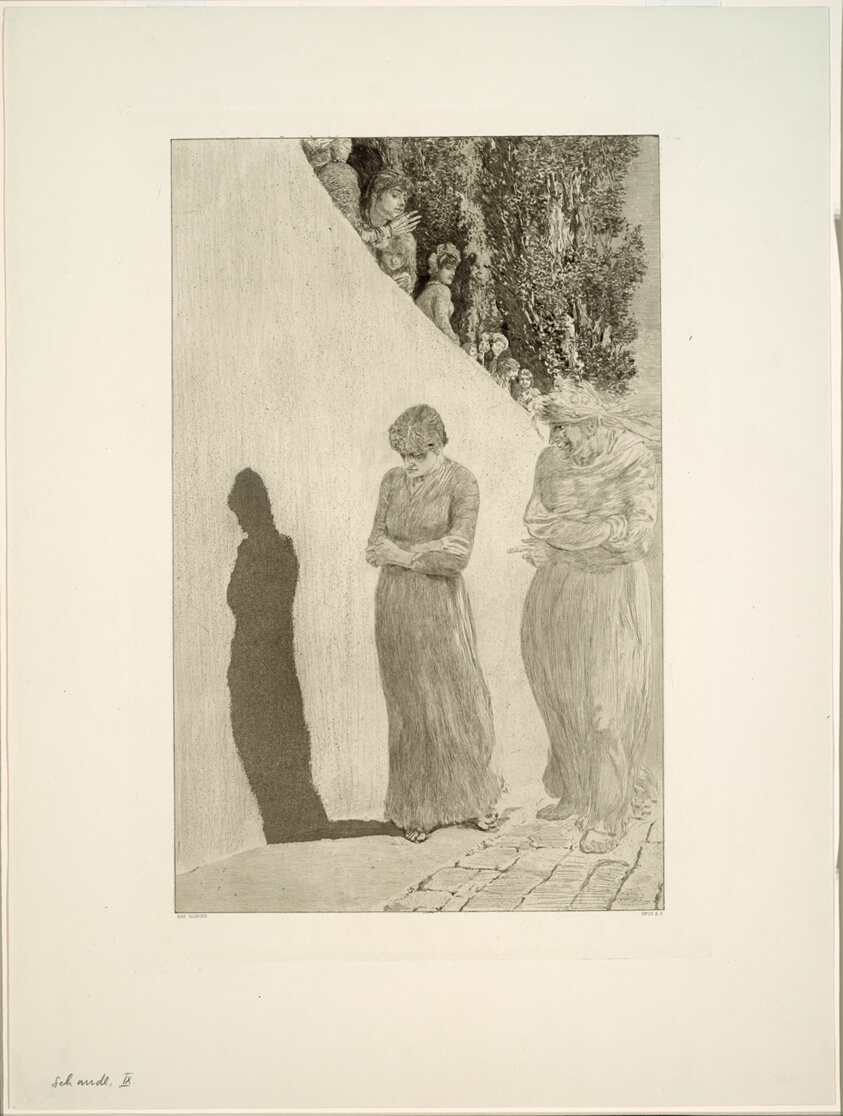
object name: Print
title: Shame, plate nine from A Love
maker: Max Klinger (German, 1857-1920)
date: 1887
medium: Etching, engraving, and aquatint on cream wove paper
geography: Germany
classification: etching; print; prints and drawing